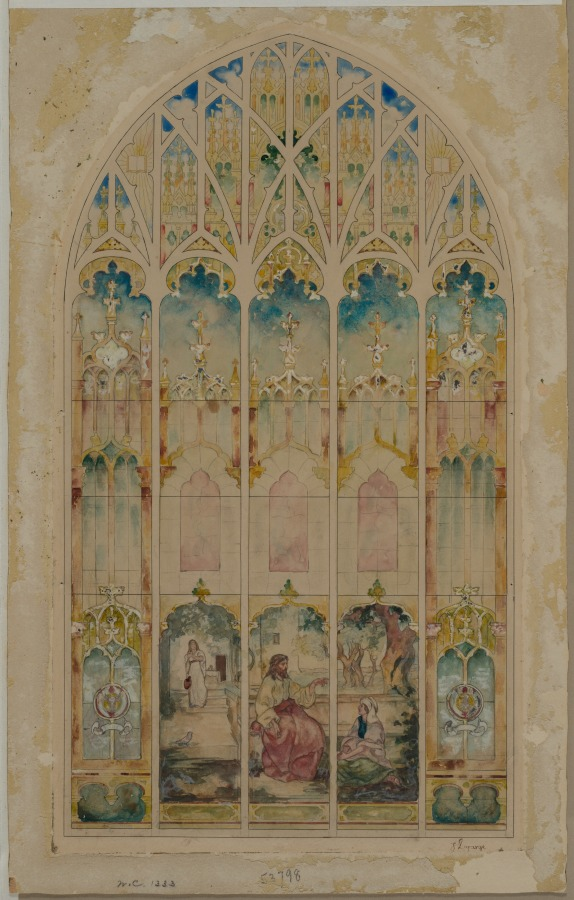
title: Chapel Window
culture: America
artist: John La Farge (American, 1835–1910)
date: c. 1850–1910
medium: watercolor with gouache over graphite; framing lines in black ink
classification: Drawing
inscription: signed, lower right, in brown ink: J LaFarge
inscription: label on verso: Knoedler, p. 1333 F 53798, Chapel Window, St. John the Divine by John La Farge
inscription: Watercolor label, verso, upper left